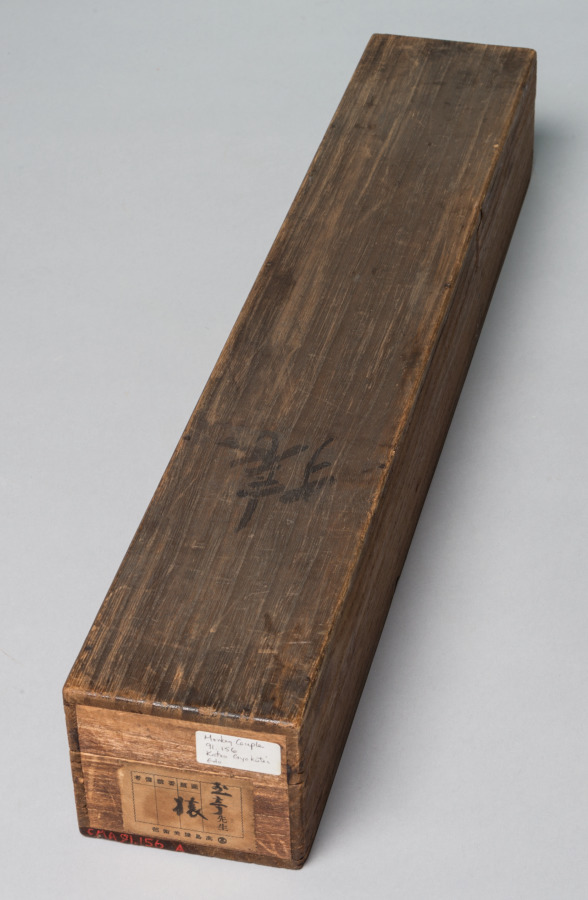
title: Monkeys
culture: Japan, Edo period (1615–1868)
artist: Gyokutei Katsu (Japanese)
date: c. 1800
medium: hanging scroll; ink on paper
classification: Painting